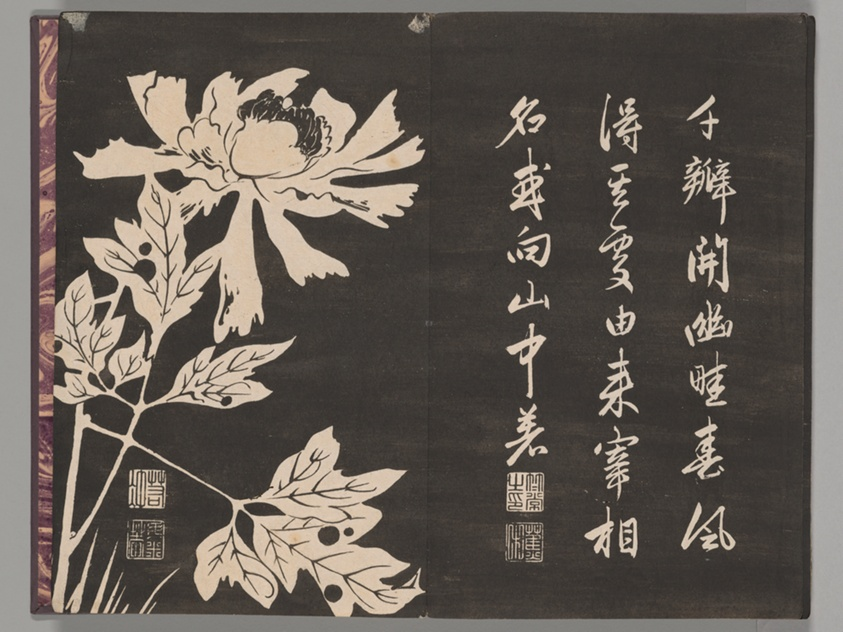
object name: Book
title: Soken sekisatsu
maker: Ito Jakuchu (Japanese, 1716-1800)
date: 1767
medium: Woodblock printed book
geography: Japan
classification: book